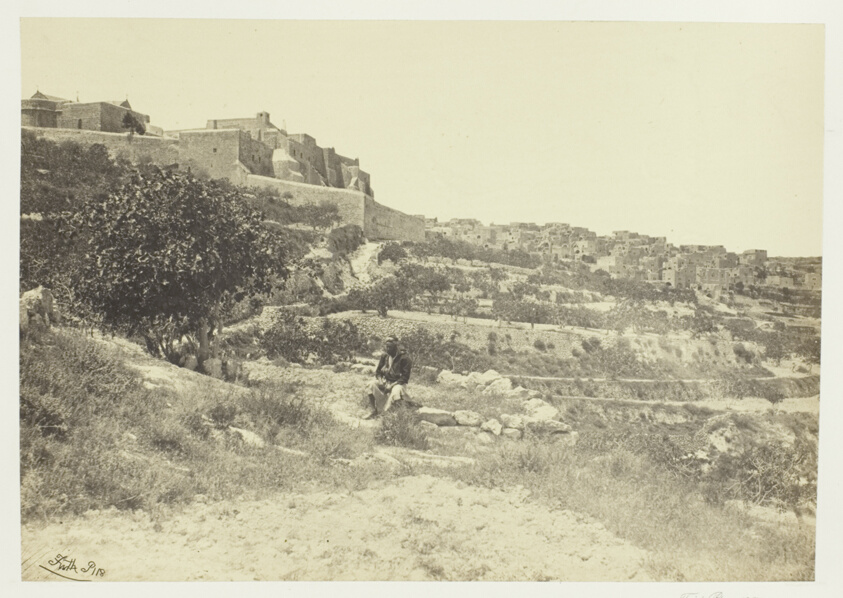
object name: Photograph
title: Bethlehem, with the Church of the Nativity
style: 19th century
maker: Francis Frith (English, 1822–1898)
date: 1857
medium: Albumen print, pl. 9 from the album "Egypt and Palestine, Volume I" (1858)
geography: England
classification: photograph; albumen silver print; photography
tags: Collected by Hugh Edwards, Egypt and Palestine